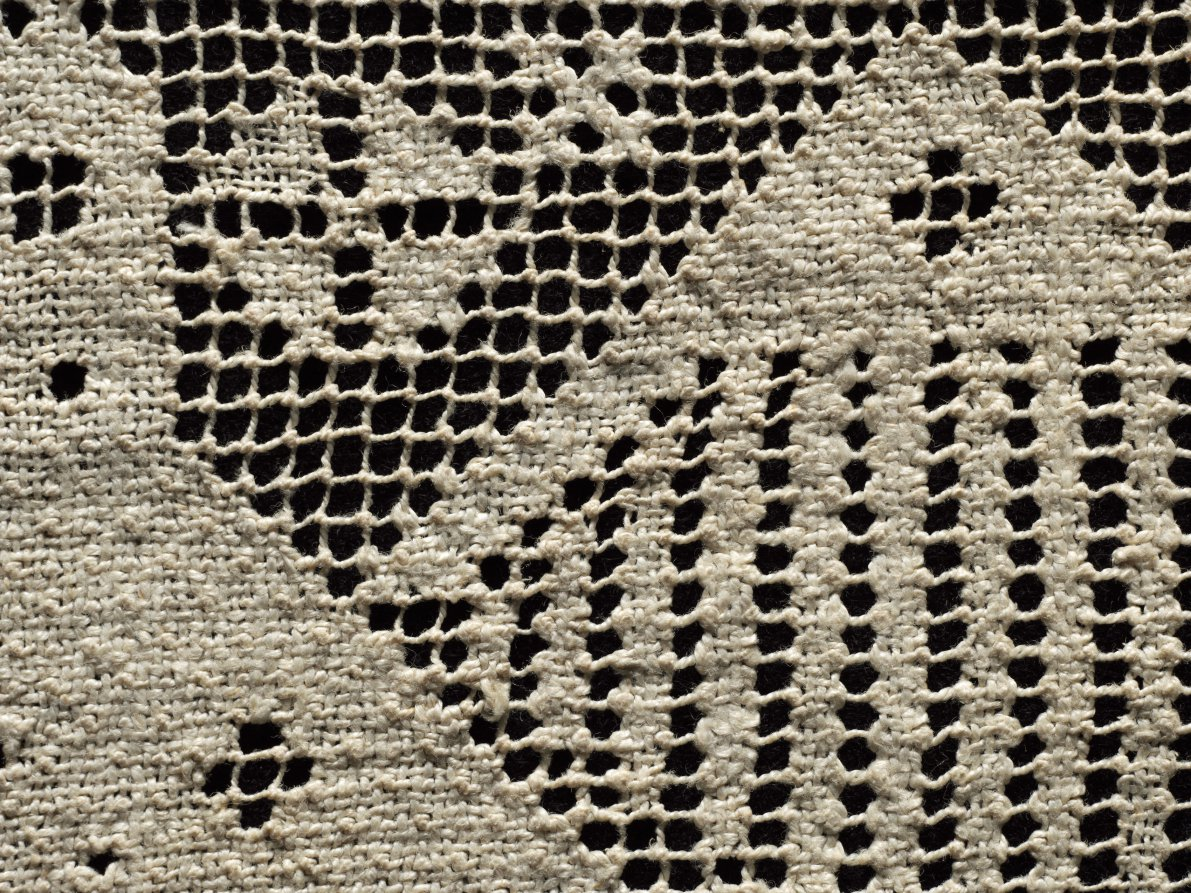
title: Panel with Birds, Flowers, and Suns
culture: Italy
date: 1500s–1600s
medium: Bleached linen (est.): needle lace, filet/lacis (knotted ground and darned in two directions)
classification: Lace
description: The repeated sun and cross motifs, representing Christ and the Crucifixion, suggest this lace panel may have been used to ornament a Christian vestment, perhaps worn by a clergy member.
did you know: Based on the ancient belief that the peacock’s flesh never decayed, they became a symbol of immortality.